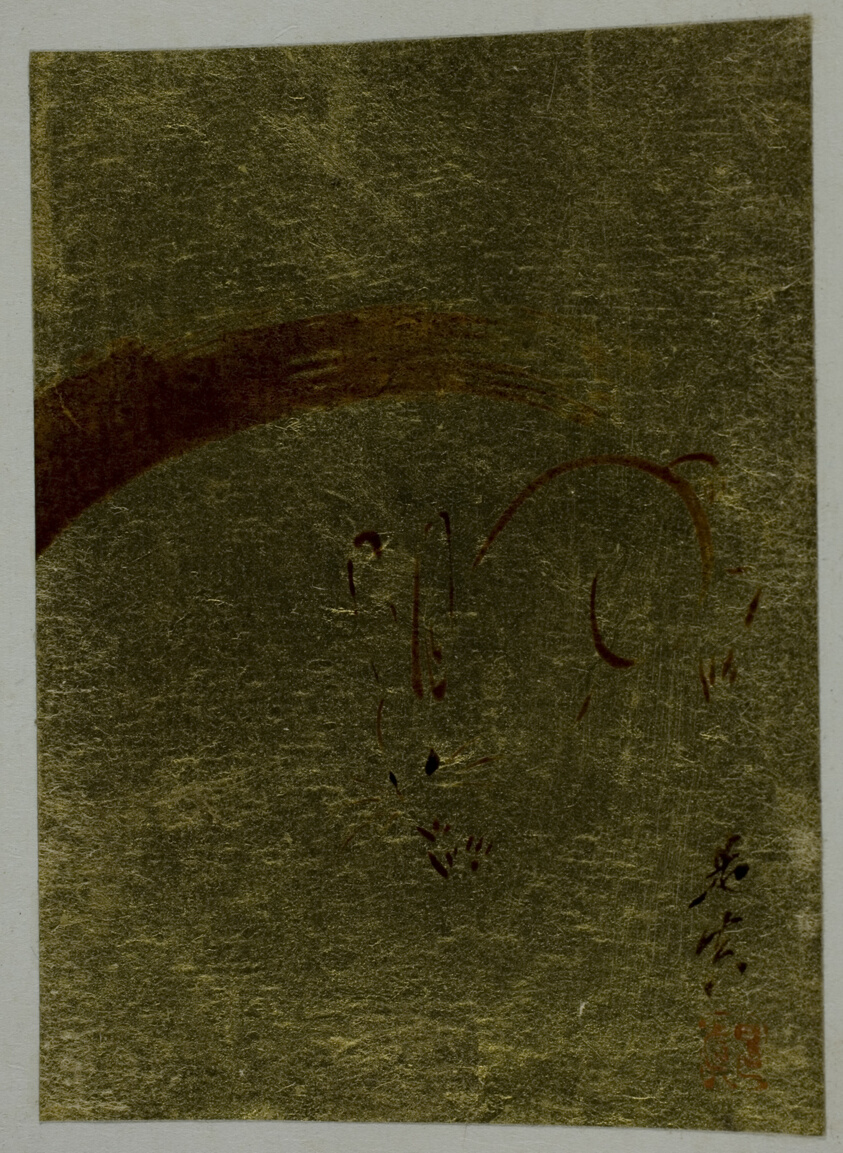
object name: Painting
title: Rabbit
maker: Shibata Zeshin (Japanese, 1807-1891)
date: Meiji period 91868–1912)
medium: Album leaf, inks and color on paper.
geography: Japan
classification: album leaf; album/sketchbook; asian art; painting